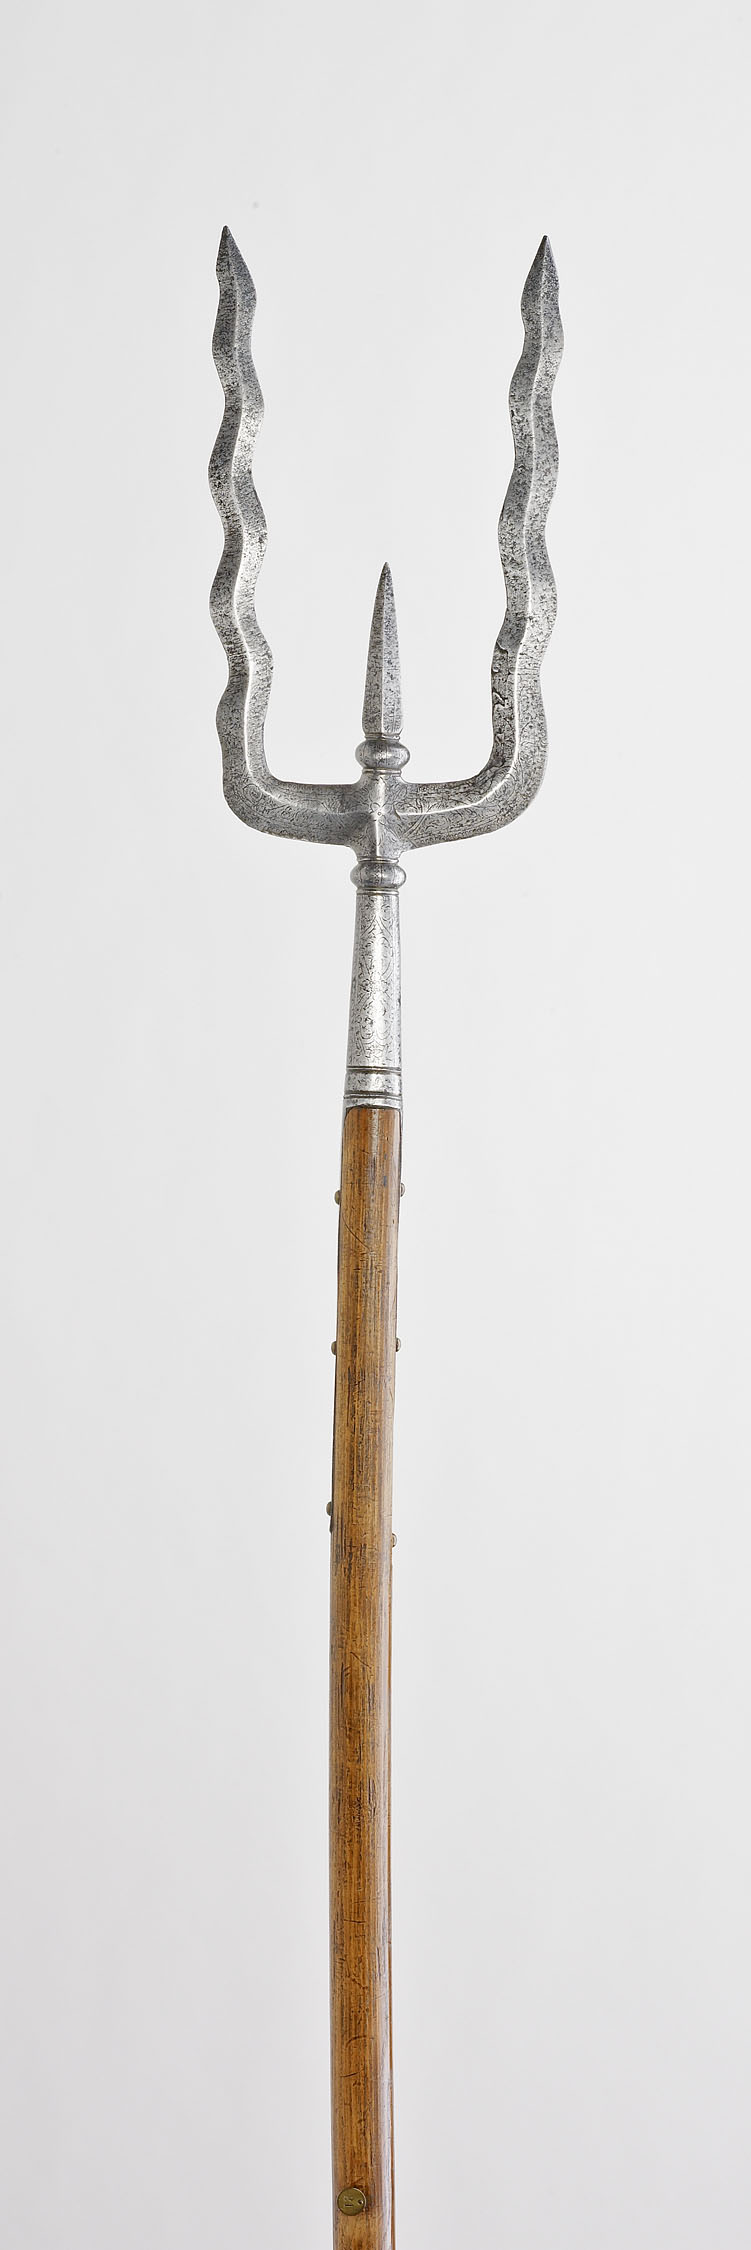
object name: Arms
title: Military Fork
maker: Northern Italian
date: 1550/1600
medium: Steel and wood (ash)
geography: Northern Italy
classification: edged weapon-staff; arms; arms and armor